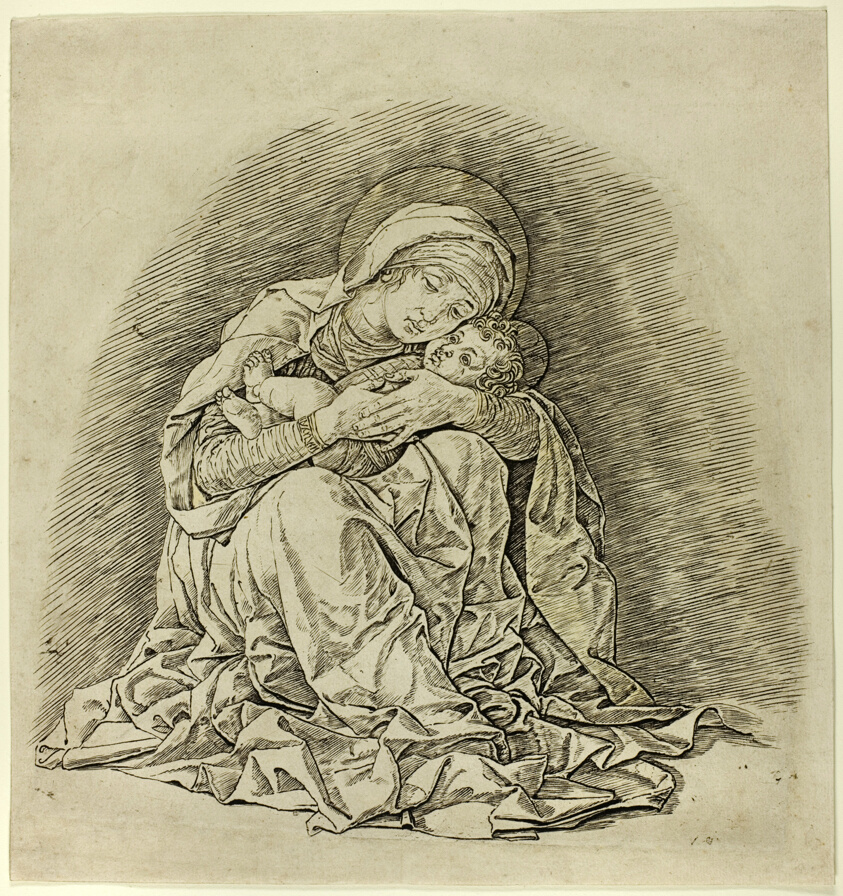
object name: Print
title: Virgin and Child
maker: Workshop of Andrea Mantegna; Italian, 1431-1506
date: 1485/91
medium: Engraving in black on buff laid paper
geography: Italy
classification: engraving; print; prints and drawing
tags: Century of Progress, world's fairs, Chicago World's Fairs